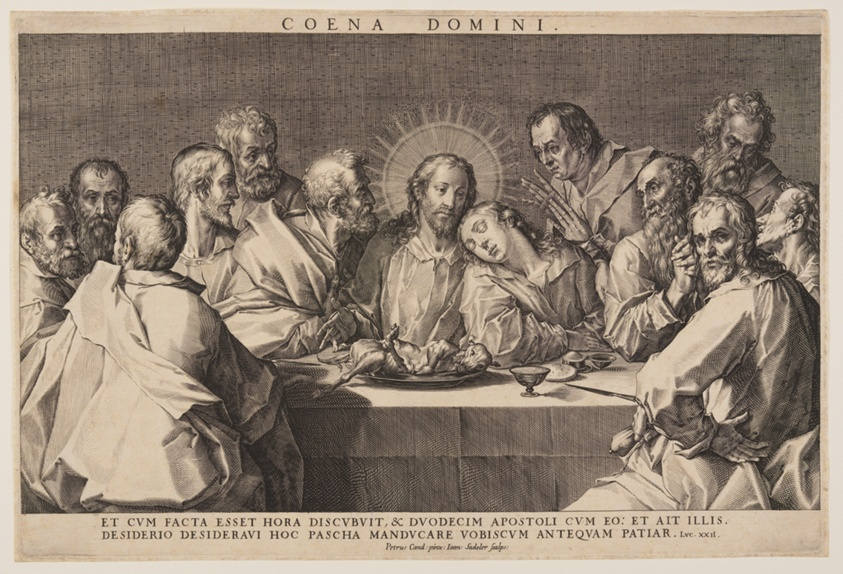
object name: Print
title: The Last Supper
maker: Jan Sadeler I (Flemish, 1550–1600); after Pieter de Witte (Flemish, 1548-1628)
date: c. 1590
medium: Engraving on ivory laid paper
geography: Flanders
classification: engraving; paper; print; prints and drawing